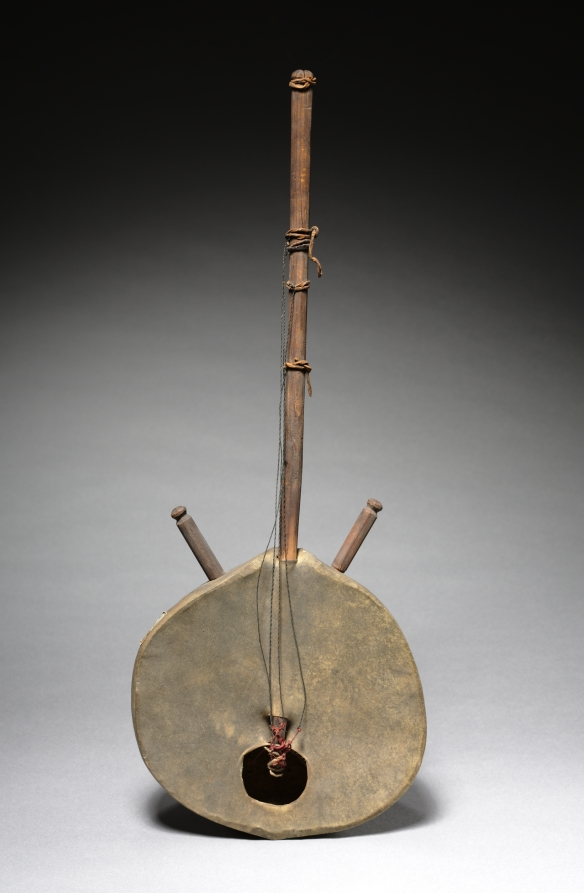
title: Mandoline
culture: Eastern Africa, Madagascar, 20th century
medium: Wood, calabash, rawhide, and string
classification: Musical Instrument